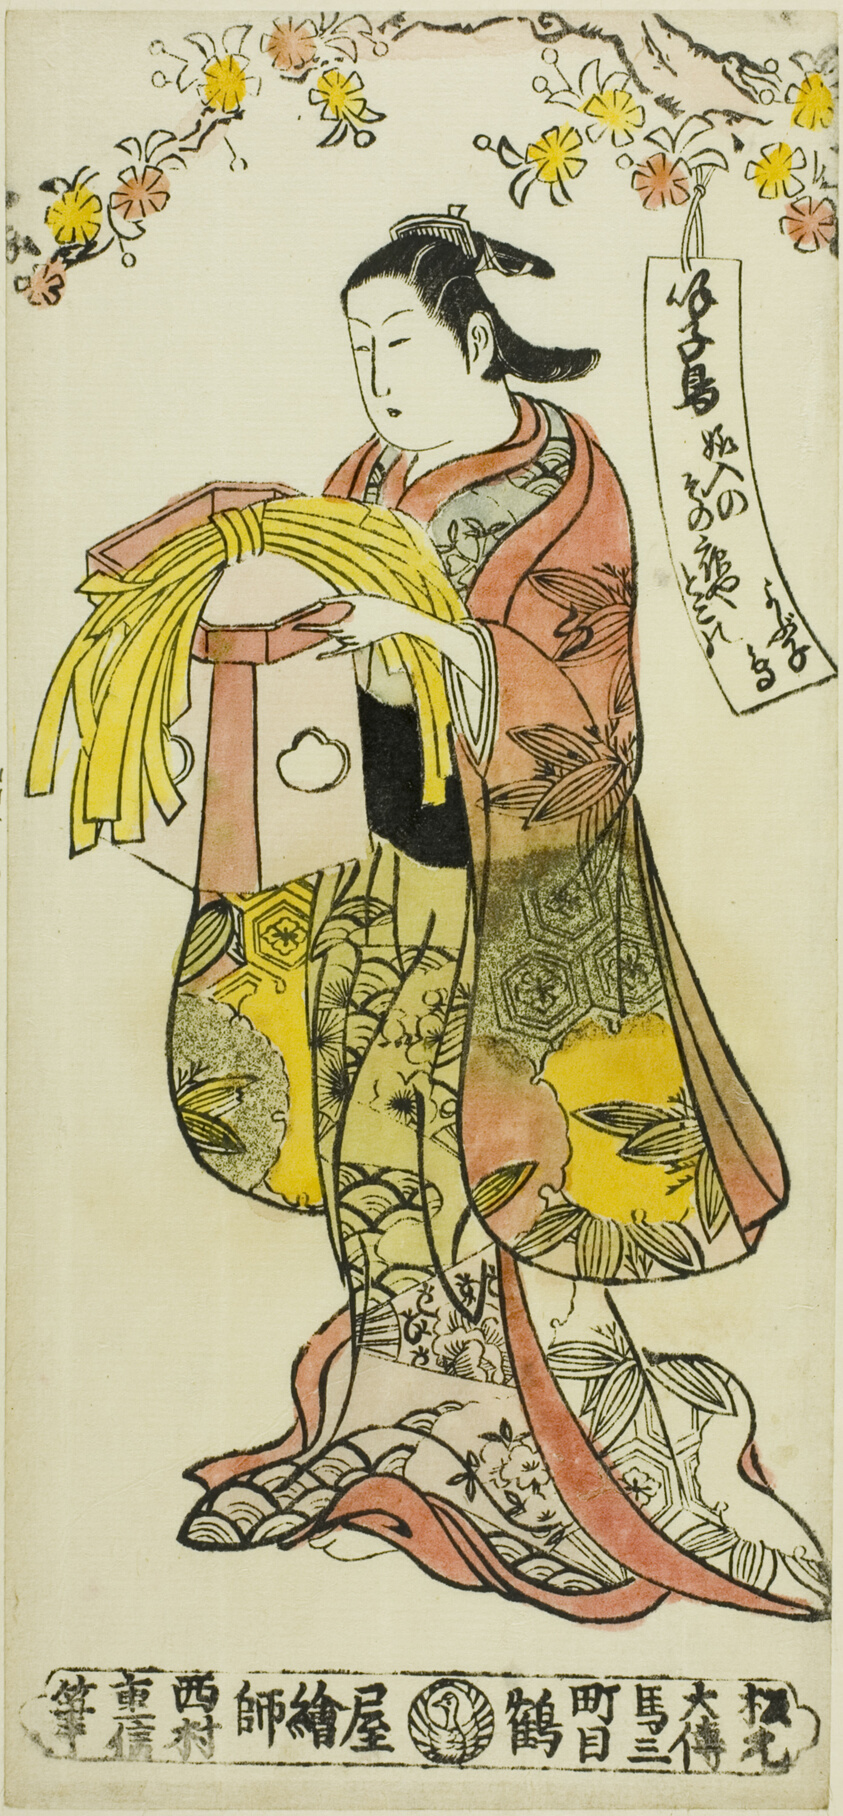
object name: Print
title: Beauty Carrying a Wedding Decoration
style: Japanese (culture or style)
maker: Nishimura Shigenobu (Japanese, active c. 1723-47)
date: c. 1735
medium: Hand-colored woodblock print; right sheet of hosoban diptych, urushi-e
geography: Japan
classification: woodblock print; print; asian art